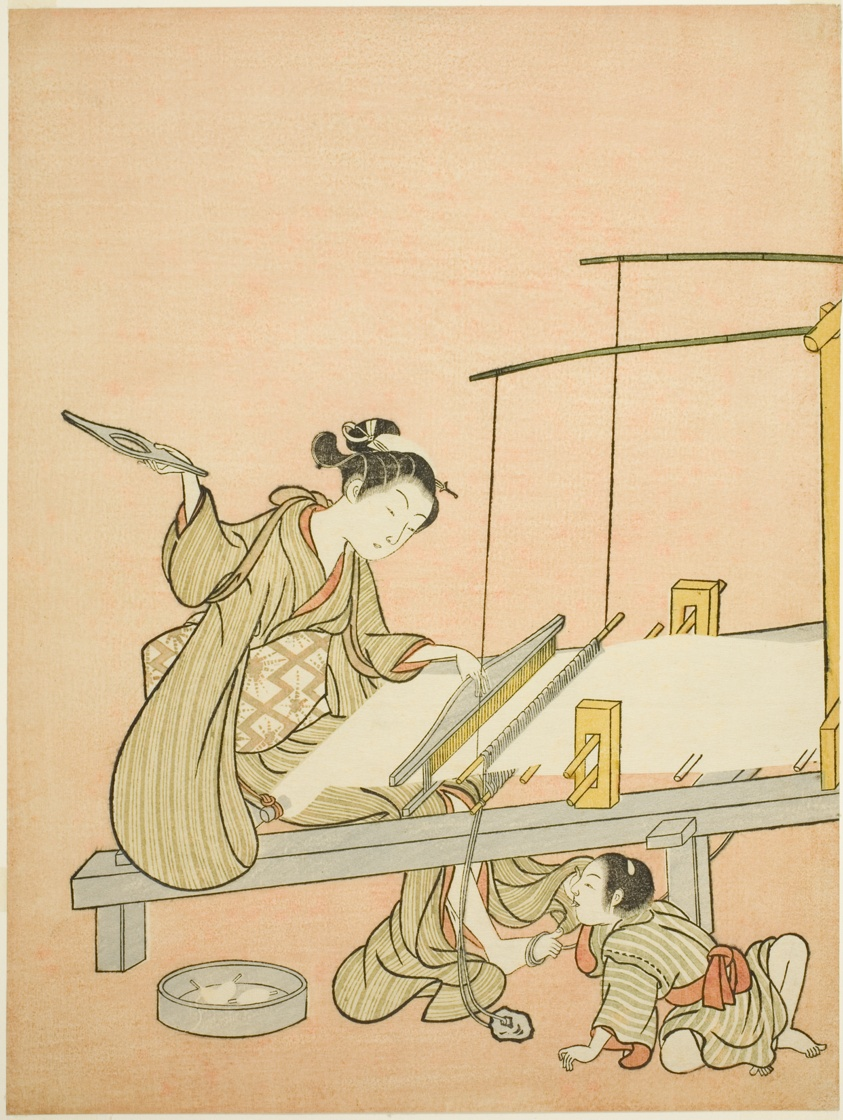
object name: Print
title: Throwing the Shuttle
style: Japanese (culture or style)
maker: Suzuki Harunobu 鈴木 春信; Japanese, 1725 (?)-1770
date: c. 1766/67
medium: Color woodblock print; chuban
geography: Japan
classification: woodblock print; print; asian art